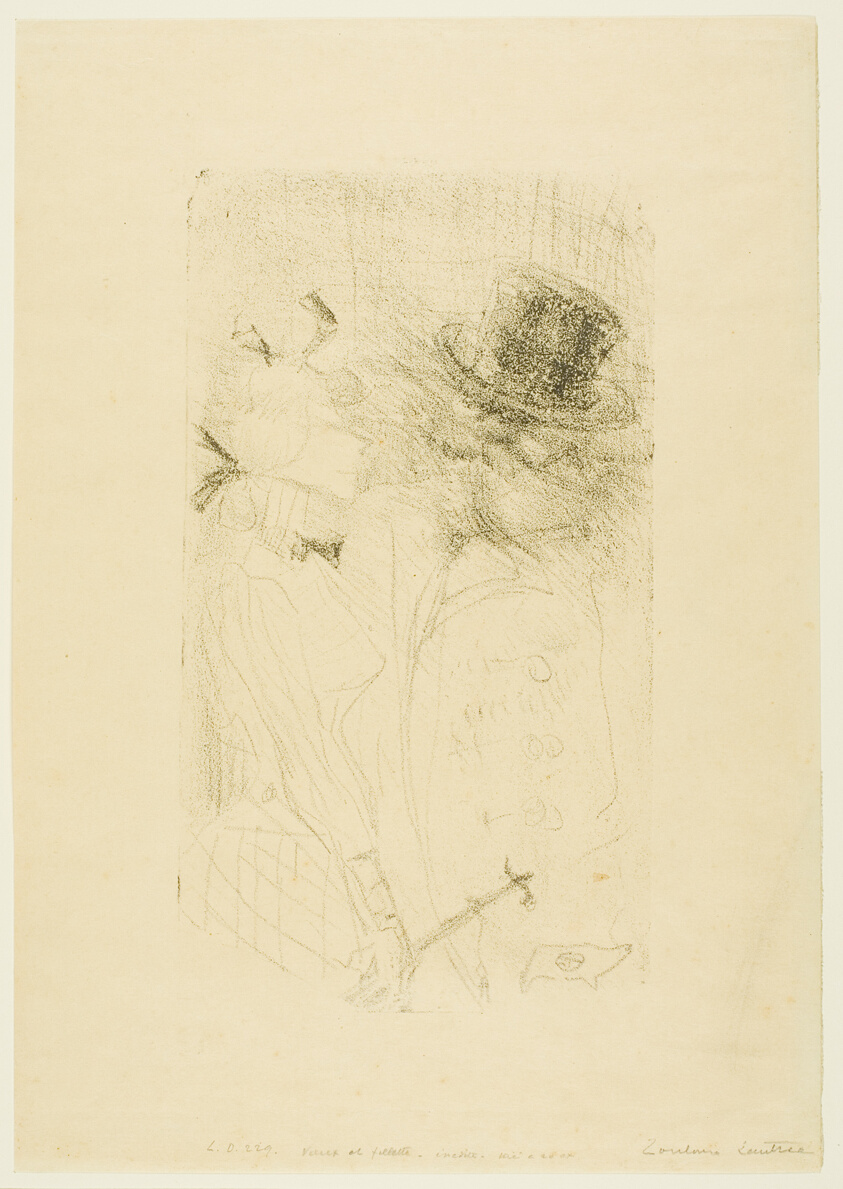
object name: Print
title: Old Man and Young Girl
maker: Henri de Toulouse-Lautrec (French, 1864-1901)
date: 1899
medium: Lithograph on cream wove paper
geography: France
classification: lithograph; print; prints and drawing